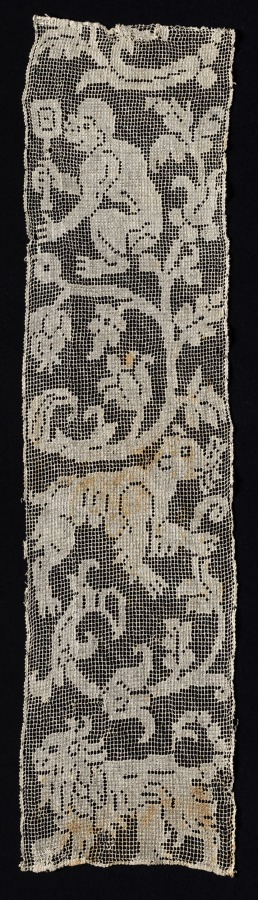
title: Fragment of a Band with Vines Surrounding a Monkey, Lion, and an Unidentified Four-Legged Animal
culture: Italy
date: 1500s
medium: Bleached linen (est.): needle lace, filet/lacis (knotted ground and darned in two directions)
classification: Lace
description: Most surviving pieces of figural lace are horizontal, making the vertical orientation of this band unique. The monkey, lion, and perhaps lioness or other feline are not native to Italy and represent exoticism and the notion of increasing international exchange at the time.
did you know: Monkeys were captured from Africa, Brazil, and India between the 15th and 17th centuries at the height of overseas exploration and sold as expensive, exotic pets to affluent European customers.